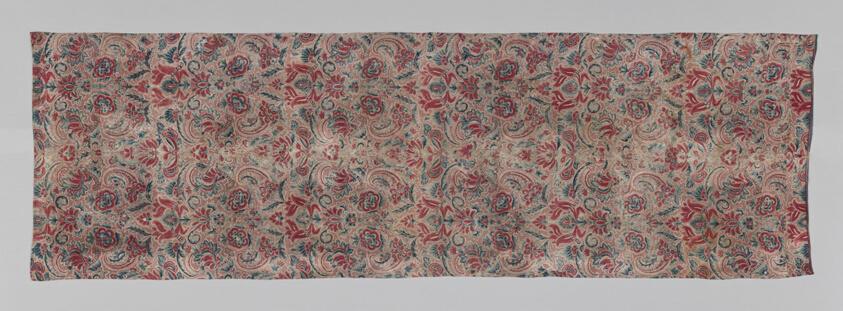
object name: Religious/Ritual Object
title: Ceremonial Hanging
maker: India, Coromandel Coast; Found in the Toraja area of Sulawesi, Indonesia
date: 18th century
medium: Cotton, plain weave; painted and resist dyed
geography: India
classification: textile; weaving - printed; weaving; ritual objects